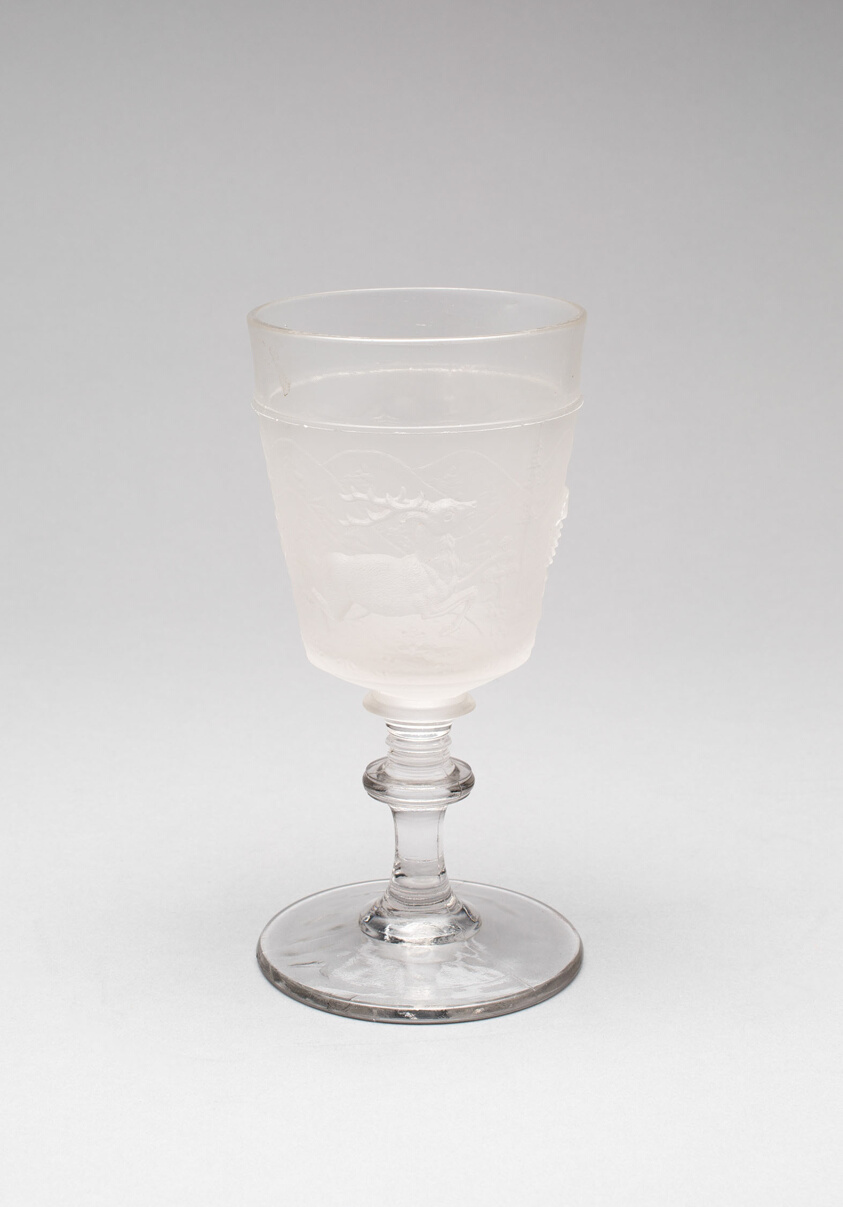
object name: Glass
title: "Westward Ho!/Pioneer" pattern goblet (one of a set of four)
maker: Gillinder and Sons, 1861–c. 1930; Philadelphia or Greenbsburg, Pennsylvania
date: c. 1876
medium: Glass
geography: Philadelphia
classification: drinking vessel; glass; american decorative arts; american arts; decorative arts